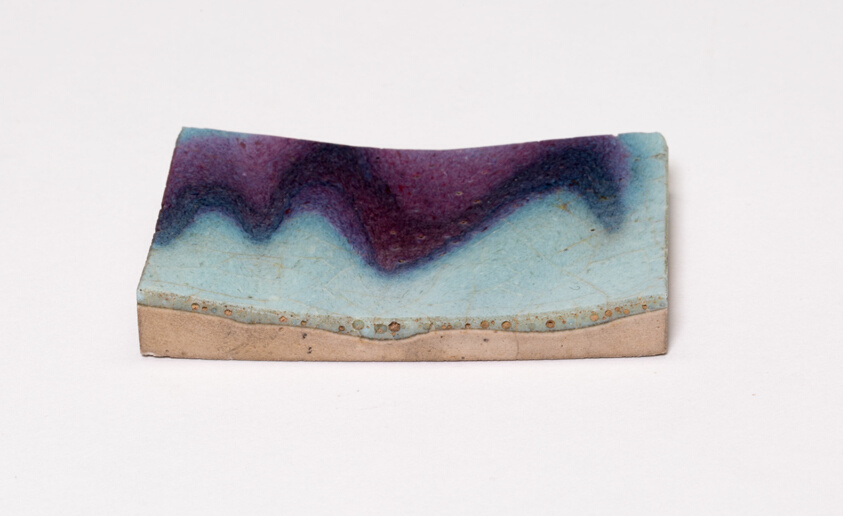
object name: Vessel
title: Rectangular Shard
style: Chinese (culture or style)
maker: China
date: Song dynasty (960–1279)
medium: Jun ware; stoneware with light blue and purple glaze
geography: China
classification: ceramics; asian art; vessel